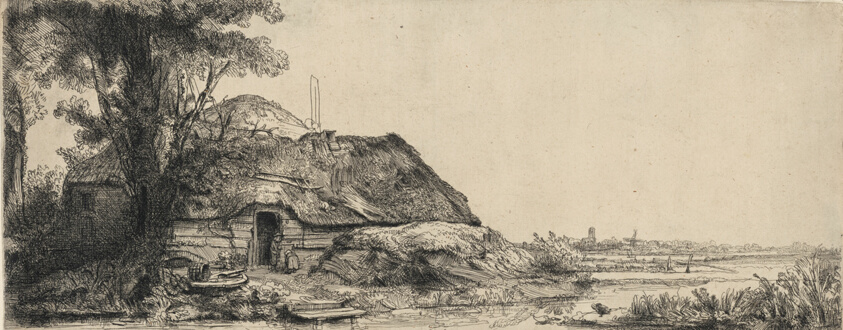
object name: Print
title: Landscape with a Cottage and a Large Tree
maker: Rembrandt van Rijn (Dutch, 1606-1669)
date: 1641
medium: Etching on ivory laid paper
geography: Holland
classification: etching; print; prints and drawing; paper